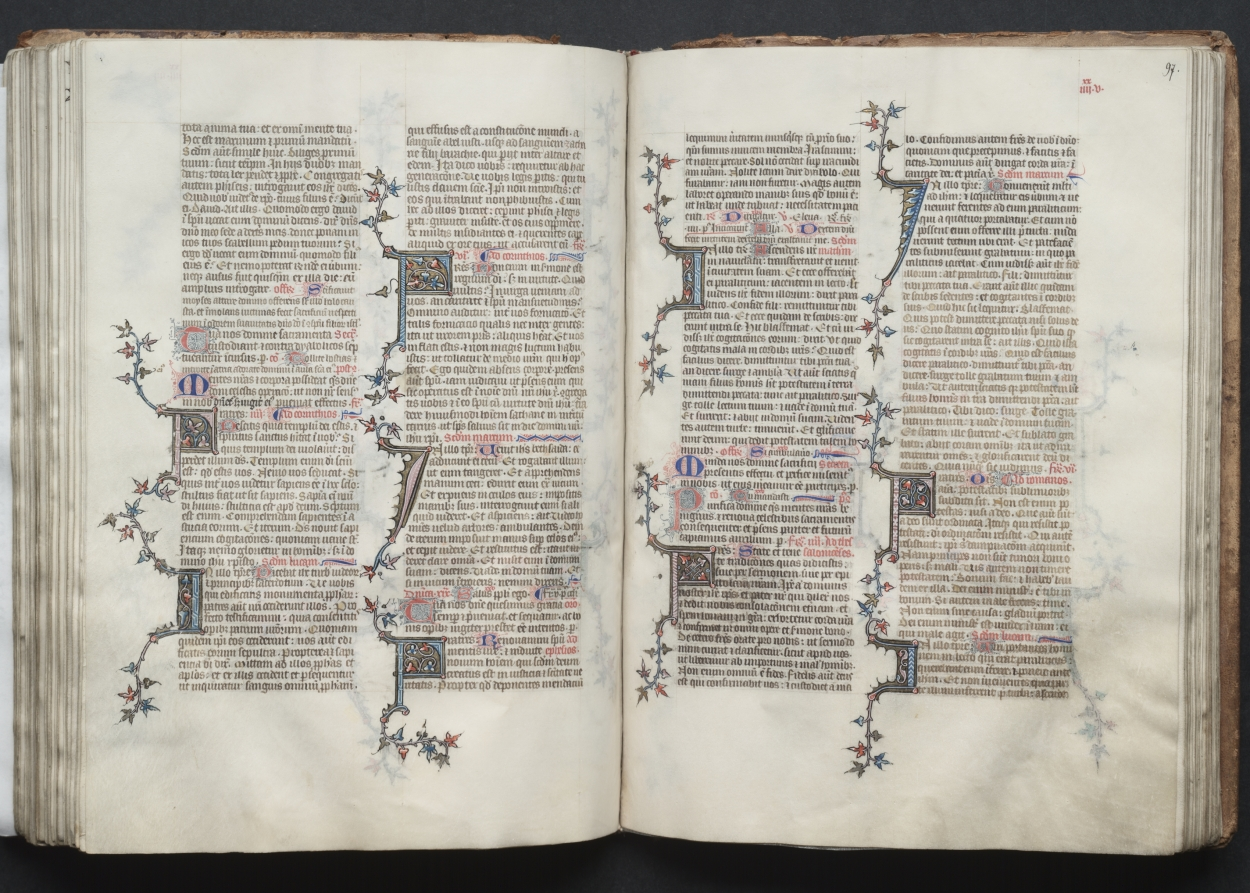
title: The Gotha Missal: Fol. 97r, Text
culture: France, Paris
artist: Master of the Boqueteaux (French)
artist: and Workshop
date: c. 1375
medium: ink, tempera, and gold on vellum; blind-tooled leather binding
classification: Bound Volume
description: The style and quality of this manuscript's decoration is typical of deluxe Parisian books made for aristocratic or royal patrons. Most of the book's decoration appears to be the work of the Master of the Boqueteaux, an artist active at the court of King Charles V (died 1380). His style was apparently shared by a number of book illuminators working in and around Paris. It is very possible that the Gotha Missal belonged to Charles V, but is not provable because the manuscript has no royal portraits and lacks a colophon. Given the book's magnificent decoration, however, it would seem that it was produced for a Valois prince, if not for the king himself. The manuscript receives its name from the German dukes of Gotha, its later owners.